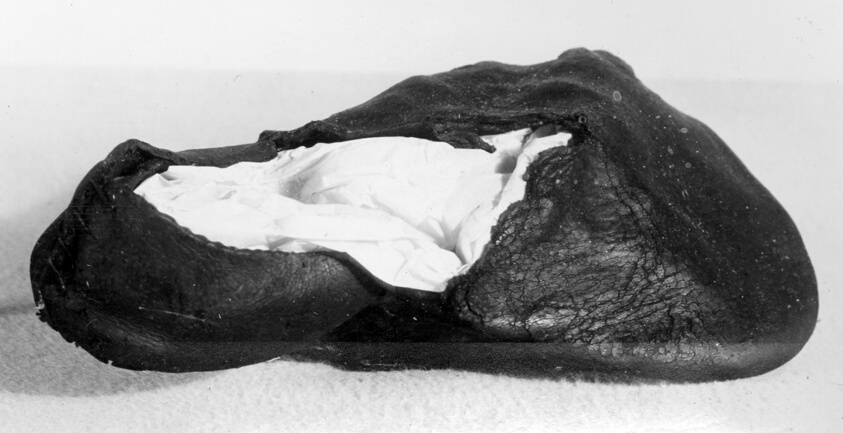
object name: Textile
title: Bear's Paw Shoe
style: tudor, european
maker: England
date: 16th century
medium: Leather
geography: England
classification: textile; costume accessory - shoe; shoes - misc; costume; dress (garment); clothing